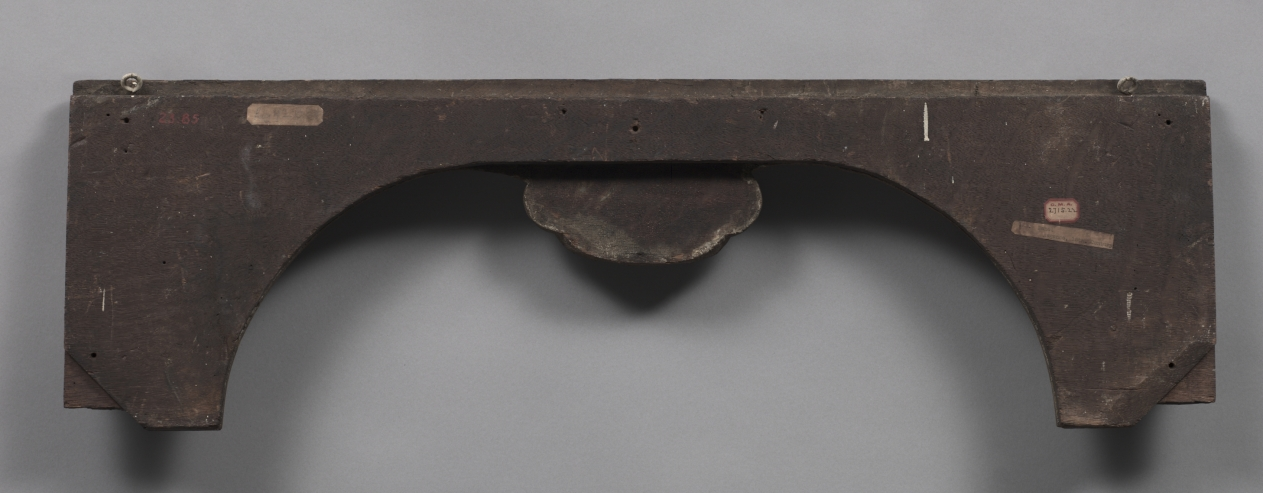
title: Panel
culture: France, Regency Period, 18th Century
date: 1715–1723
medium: wood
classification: Furniture and woodwork